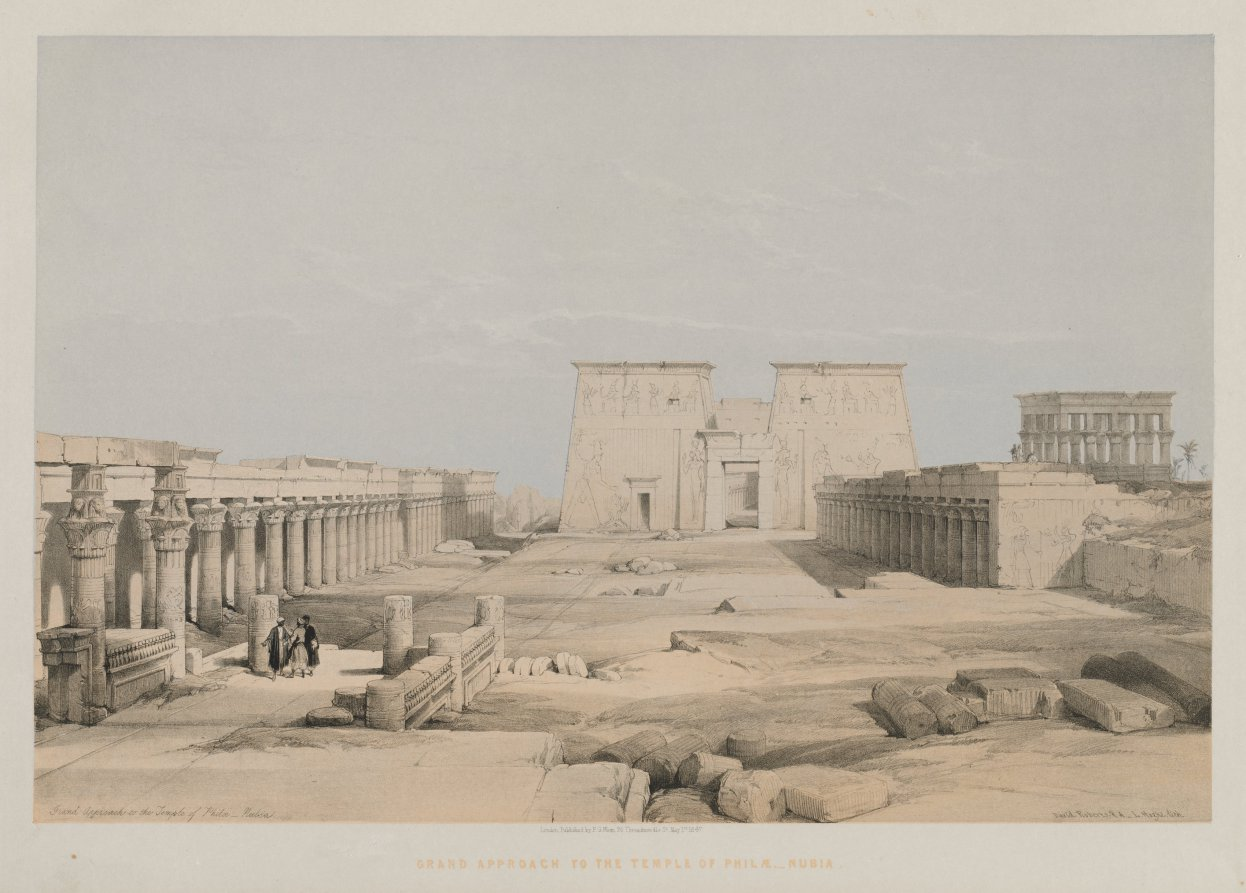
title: Egypt and Nubia, Volume I: Grand Approach to the Temple of Philae, Nubia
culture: England, 19th century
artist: Louis Haghe (British, 1806–1885)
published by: F. G. Moon, 20 Threadneedle Street, London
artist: after David Roberts (Scottish, 1796–1864)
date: 1847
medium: color lithograph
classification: Print